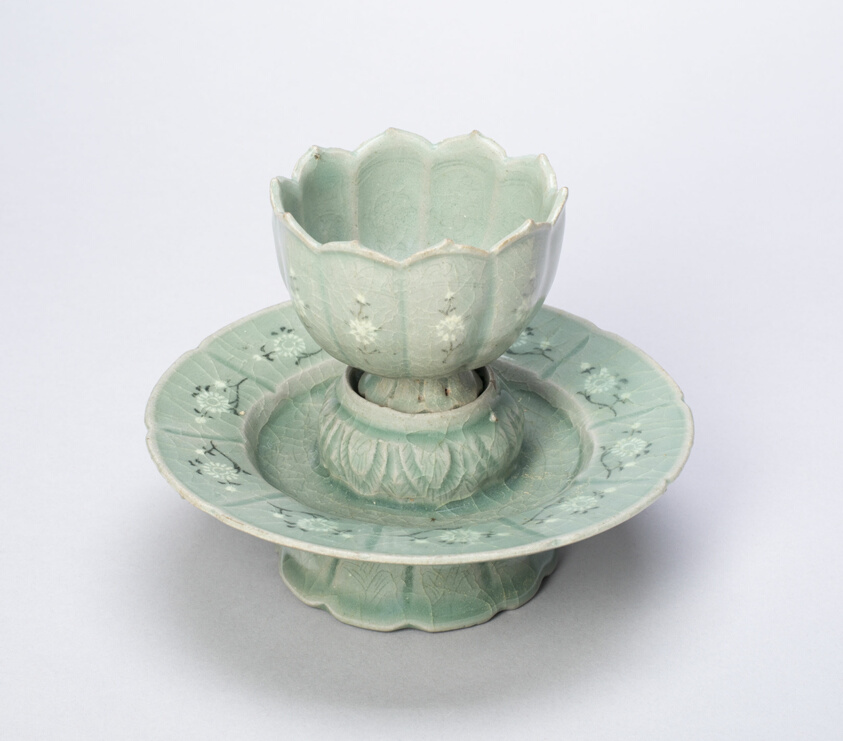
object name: Vessel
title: Lobed Cup and Stand with Chrysanthemum Motif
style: Korean (culture or style)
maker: Korea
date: Goryeo dynasty (918–1392), 12th-13th century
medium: Stoneware with red and white slip and celadon glaze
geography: South Korea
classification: drinking vessel; vessel